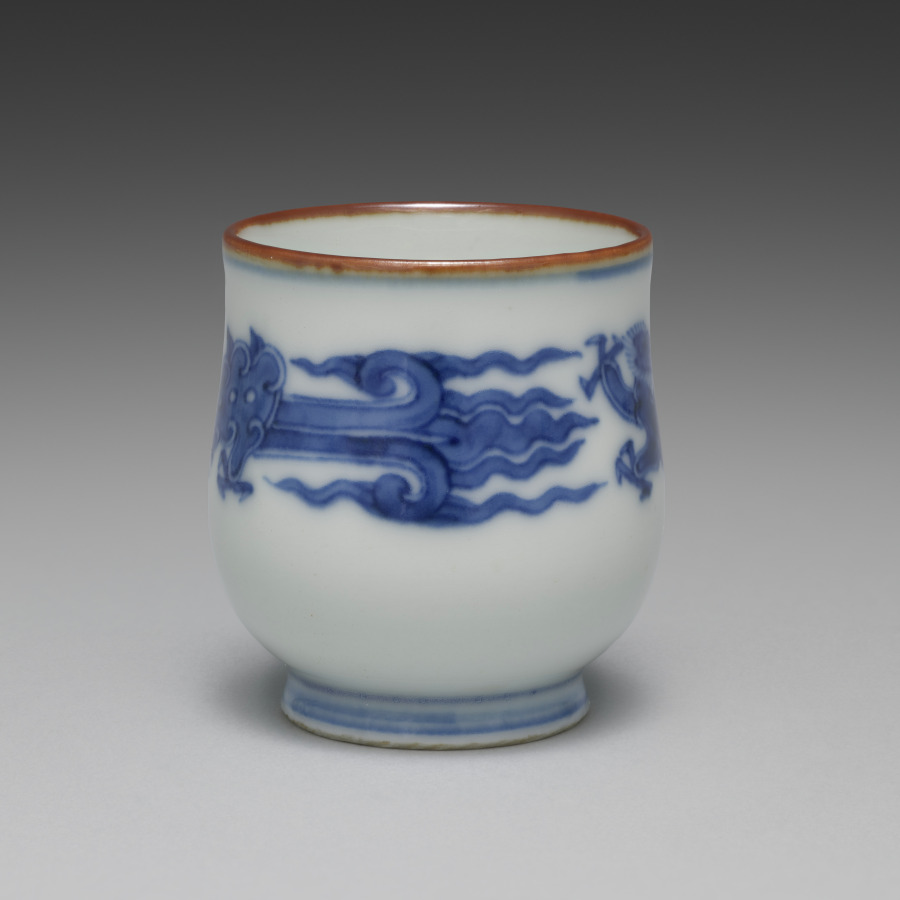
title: Cup from Sake Cups with Dragons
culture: Japan, Meiji period (1868–1912)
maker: Seifū Yohei III (Japanese, 1851–1914)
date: c. 1893–1914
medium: One from a set of six sake cups; porcelain with underglaze blue and iron oxide rims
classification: Ceramic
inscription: 大日本清風造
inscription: 清風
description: Each of these sake cups pictures two backward-looking dragons. The highly stylized creatures resemble jade carvings.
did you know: Seifū Yohei III was inspired by the Chinese mythical animals that were common on porcelain objects made at Jingdezhen in China during the Ming dynasty (1368–1644) and then exported around the world.